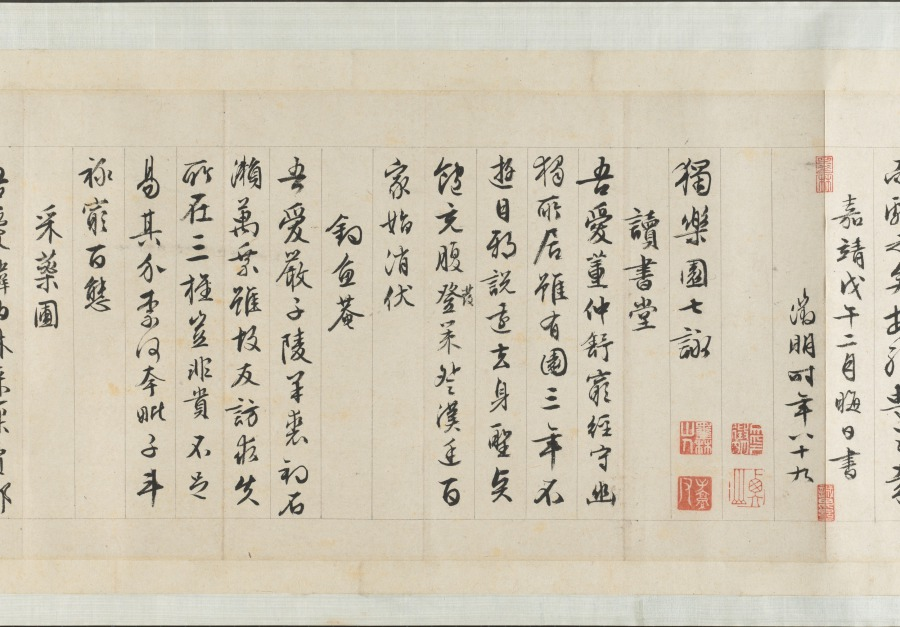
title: Garden for Solitary Enjoyment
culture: China, Ming dynasty (1368–1644)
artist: Qiu Ying (Chinese, 1494–1552)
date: 1515–52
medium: Handscroll; ink and light color on silk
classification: Painting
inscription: Accompanying text of an essay together with seven poems of Sima Guang (1019–1086) and one poem of Su Shi (1037–1101) written by Wen Zhengming (1470–1559) in 1558.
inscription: 2 colophons and 82 seals: 4 seals of Wen Zhengming 文徵明 (1470–1559); 59 seals of Xiang Yuanbian 項元汴 (1525–1590); 1 colophon, dated 1644, and 7 seals of Xiang Yukui 項禹揆 (c. late 1500s–1659); 1 colophon, dated 1880, and 2 seals of Weng Tonghe 翁同龢 (1830–1904); 2 seals of Ch'eng Chen-i (19th c.); 1 seal of Han Ch'ung (19th c.); 4 seals of Wan-go H. C. Weng 翁萬戈 (1918–2020); 3 seals unidentified.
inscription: Colophon by Xiang Yukui 項禹揆 (c. late 1500s–1659): The painting of The Garden for Self-enjoyment on the right by Shih-chou, Mr. Qiu [Qiu Ying] is in the style of Li Lung-mien. Its mood is peaceful, as if meeting the ancient gentlemen face to face among the brushes and silk; it lifts one above the sordid bustle of life. Formerly, my late father handed me this scroll which had only the painting without the written essay. I considered asking a good calligrapher to write the essay to add to it but was afraid that the quality of the writing would not match the painting. Several years later, I saw at a friend's house this essay and poems (of Ssu-ma Kuang] written by Hengshan [Wen Zhengming], once owned by my grandfather; so I spared no expense to obtain it. I rejoiced at this and said: "The divine swords are finally united. How things are pre-destined!" Now my friend Chang Kung-chao's technique for mounting [painting and calligraphy] is excellent. Therefore by daring to take them out and join them together, I can preserve this beautiful story of singular reunion. Xiang Yukui recorded at Hai-yeh-t'ang [hall] two days before New Year's Eve in the jiasheng year of the Chongzhen era [1644]. trans. LYSL/HK/WKH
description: Garden of Solitary Enjoyment refers to a site built in 1073 by the statesman Sima Guang (1019–1086) after he had retired to Luoyang, Henan province. Every spring, visitors would flock to his garden. Each of its seven structures references a historic figure. Sima wrote: I channel streams [like Du Mu], to water flowers [like Bai Juyi], or trim bamboo [like Wang Huizhi]. . . . I know of no joy between heaven and earth that could take its place. Qiu Ying’s painting, created after an 11th-century version of the same theme, must have appealed to garden owners of the Ming dynasty, since it became the template for numerous Suzhou workshop copies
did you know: Sima Guang completed his monumental survey of Chinese history, Zizhi tongjian, in the garden depicted in this painting.